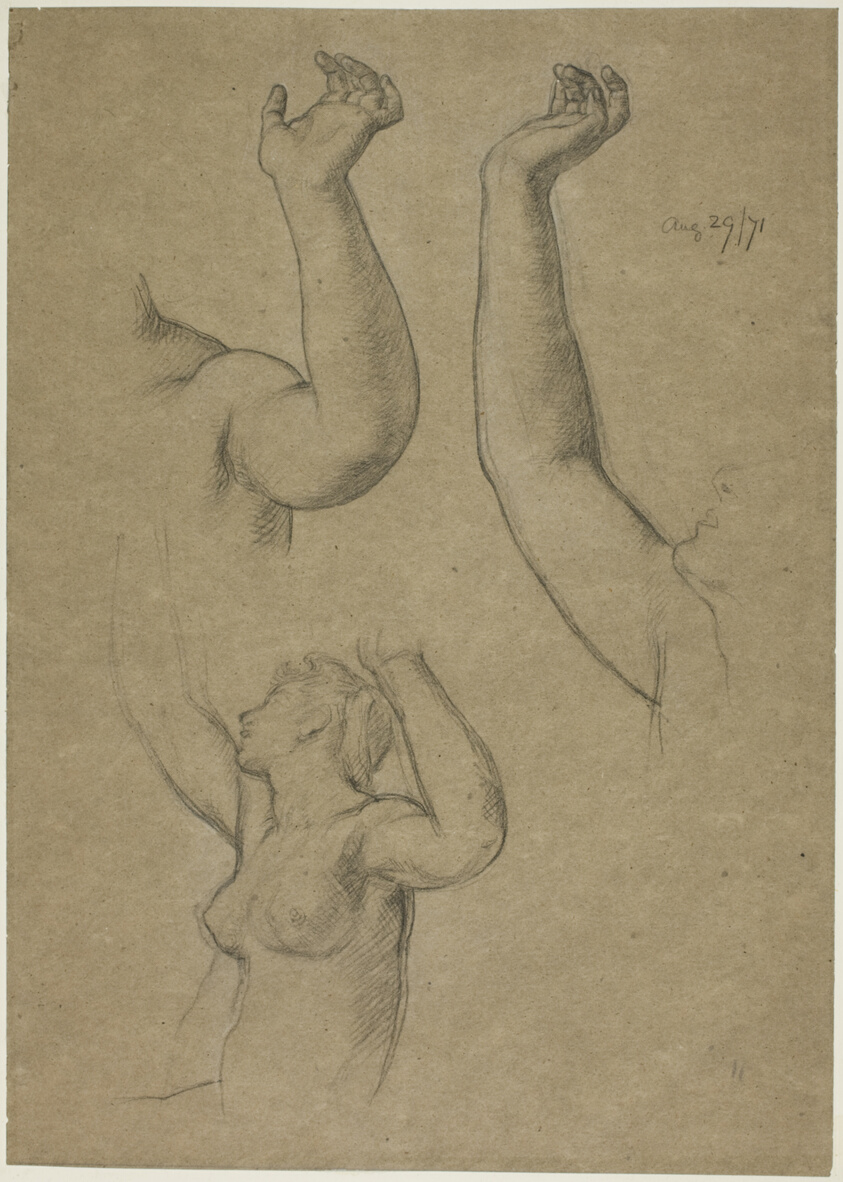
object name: Drawing and Watercolor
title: Study for The Festival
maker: Sir Edward John Poynter; English, 1836-1919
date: 1871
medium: Black chalk with traces of white chalk on gray-brown wove paper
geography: England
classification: chalk; paper; prints and drawing